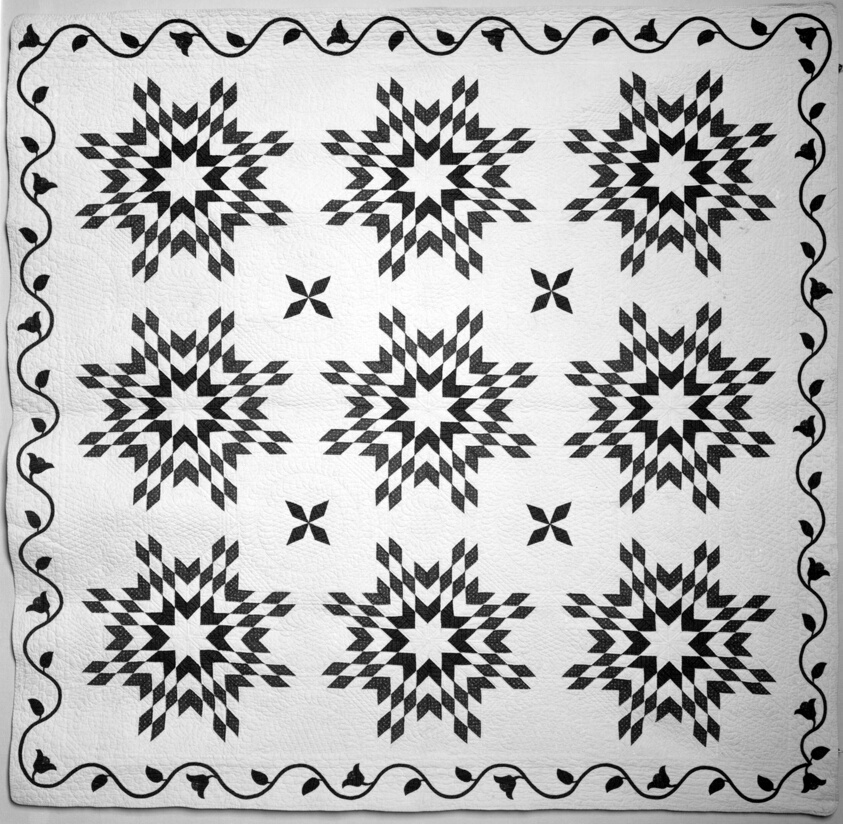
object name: Textile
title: Bedcover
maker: United States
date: c. 1850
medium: Cotton, plain weave; pieced; appliquéd with cotton, plain weave, printed; quilted; backed with cotton, plain weave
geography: United States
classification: textile; needlework - quilt